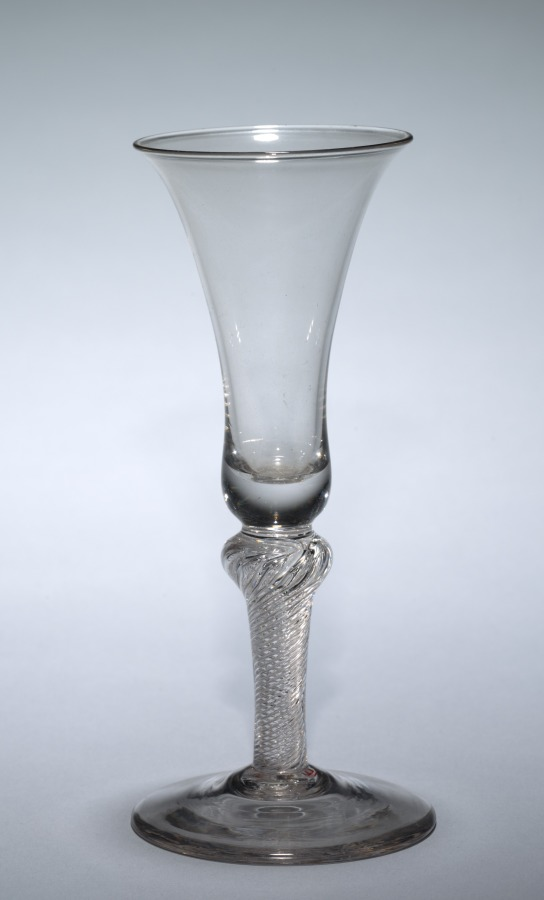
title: Wine Glass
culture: England, 18th century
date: 1750–1799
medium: glass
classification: Glass